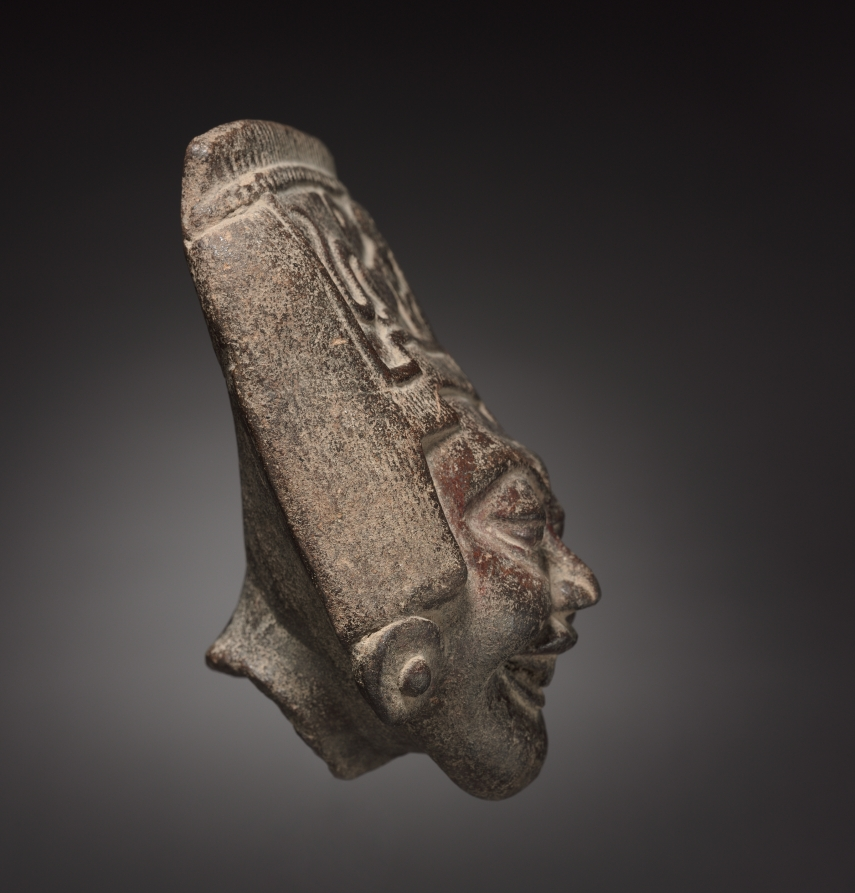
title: Head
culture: Mexico, Classic Veracruz (Remojados Culture)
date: 600–1100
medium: terracotta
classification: Sculpture